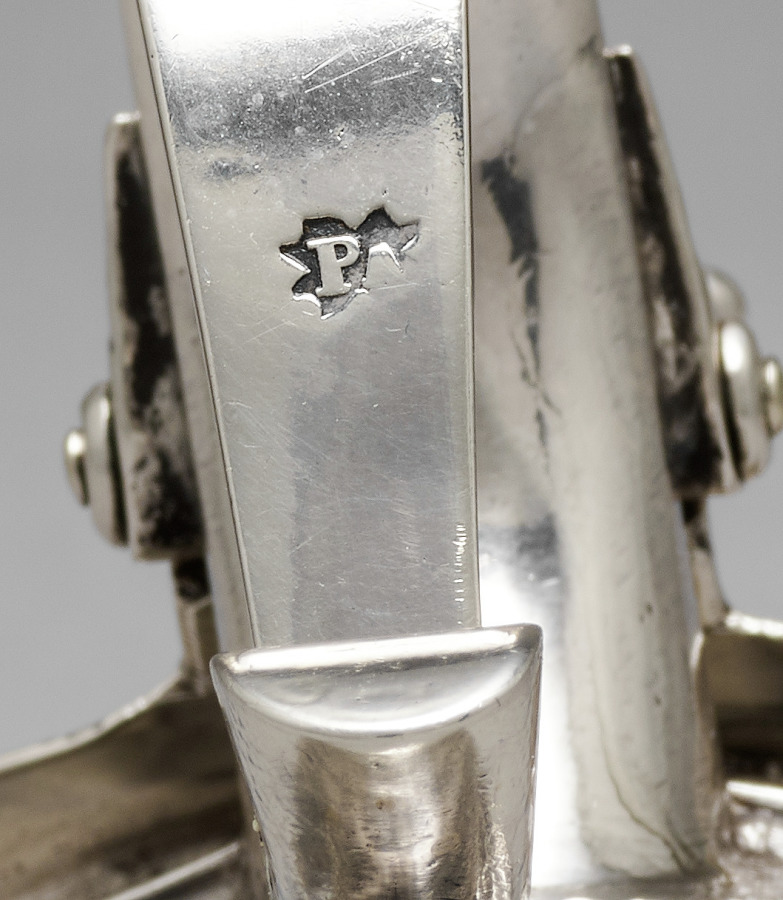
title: Tankard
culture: England, London, early 18th Century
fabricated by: Thomas I Parr (British)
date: 1701–1702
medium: silver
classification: Silver